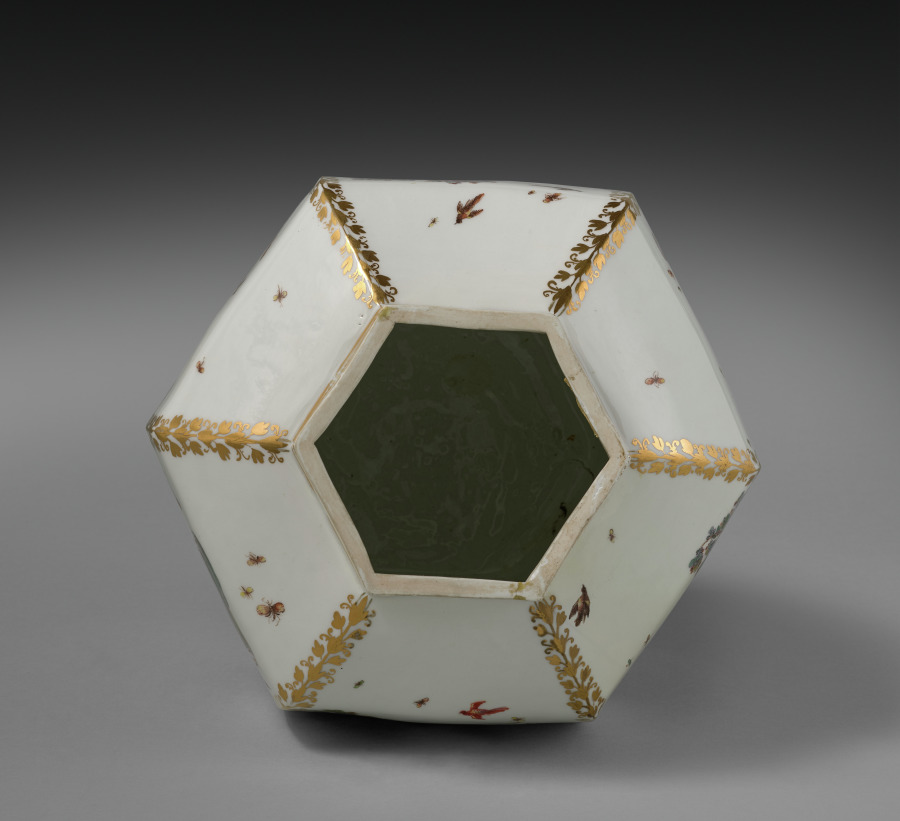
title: Vase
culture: Germany, Meissen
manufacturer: Meissen Porcelain Factory (German, est. c. 1710)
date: c. 1728–30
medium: porcelain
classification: Ceramic